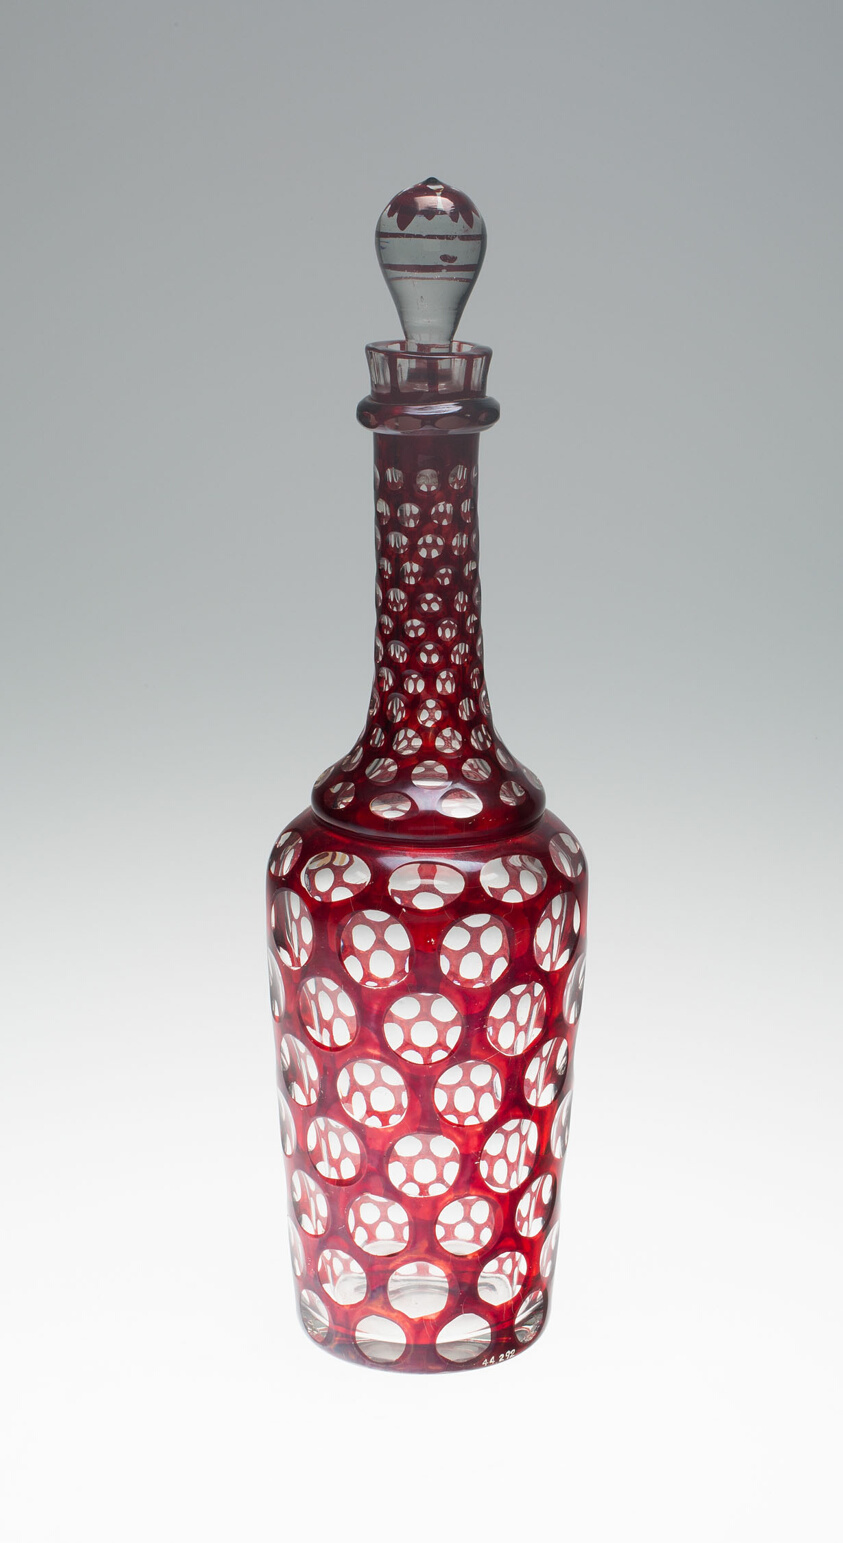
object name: Glass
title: Decanter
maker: Bohemia, Czech Republic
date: c. 1840/50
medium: Glass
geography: Bohemia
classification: glass; european decorative arts